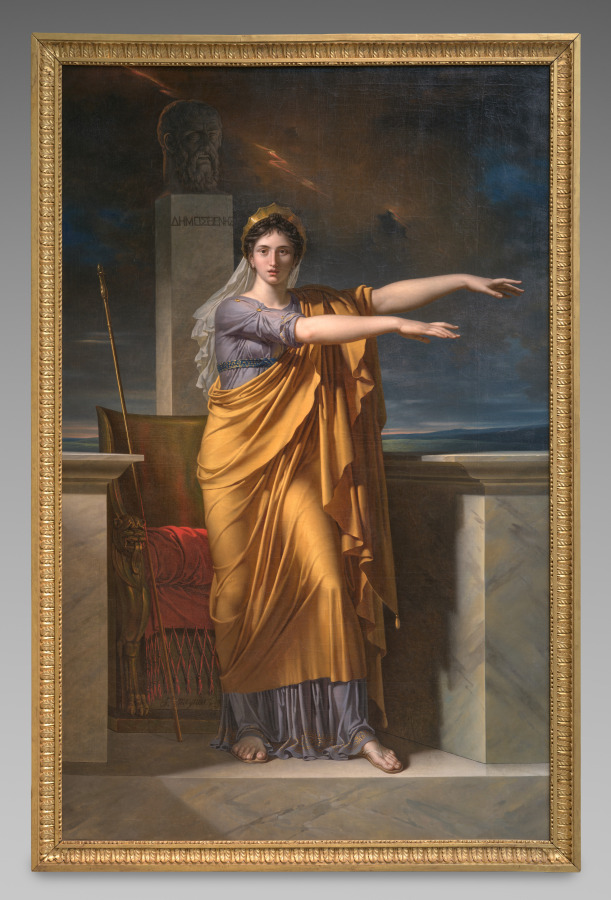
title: Polyhymnia, Muse of Eloquence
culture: France, late 18th-early 19th century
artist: Charles Meynier (French, 1768–1832)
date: 1800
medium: oil on canvas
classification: Painting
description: Polymnia is one of the nine muses in Greek mythology and a patron of dancing or geometry. She is portrayed here standing in front of a bust of the Athenian orator Demosthenes. This painting belongs to a cycle of five works commissioned by businessman François Boyer-Fonfréde for his home in Toulouse.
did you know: Meynier was trained in a studio known by the students of Jacques-Louis David as the atelier of the "perruques" (wigs), a name given to royalists or conservatives of the period.